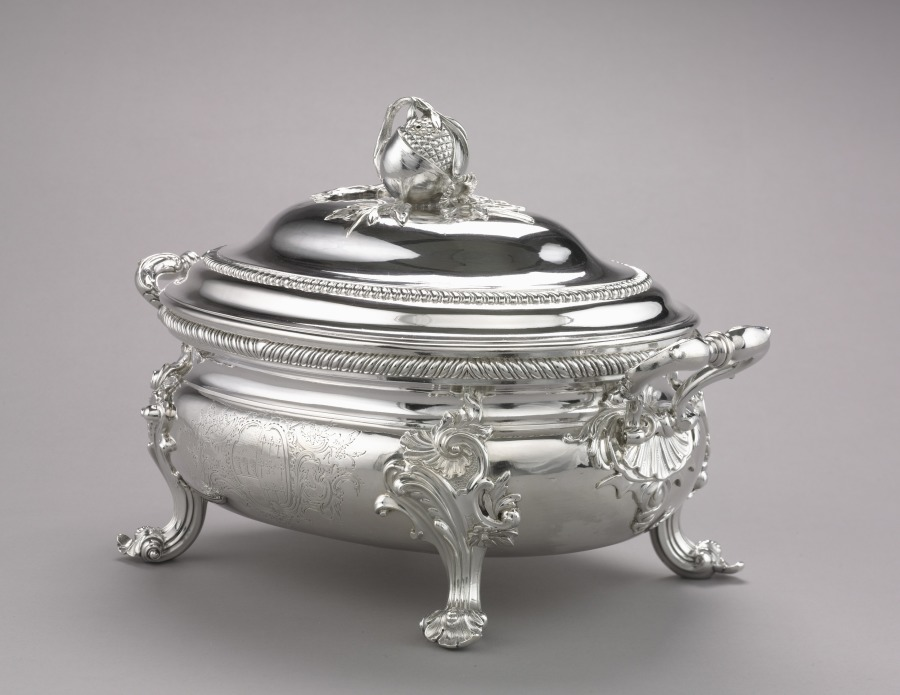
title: Covered Tureen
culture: England, 18th century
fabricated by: Edward Wakelin (British, 1784)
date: 1753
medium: silver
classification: Silver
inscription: engraved coat of arms of Admiral Edward Vernon of Nacton (1684-1757) and his wife Sarah, daughter of Thomas Best. Engraved on cover is Vernon crest, a woman holding a scythe.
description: A very successful silversmith, Edward Wakelin may have been more a businessman than a craftsman or designer.